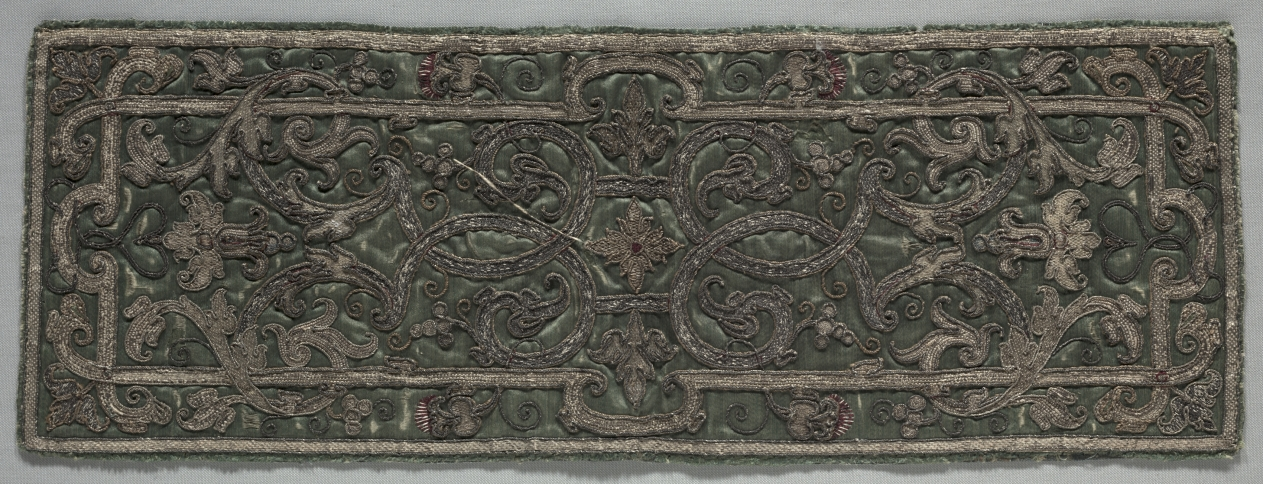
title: Apparel from a Dalmatic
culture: Italy, early 16th century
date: early 1500s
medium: embroidery; silk and metallic threads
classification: Embroidery